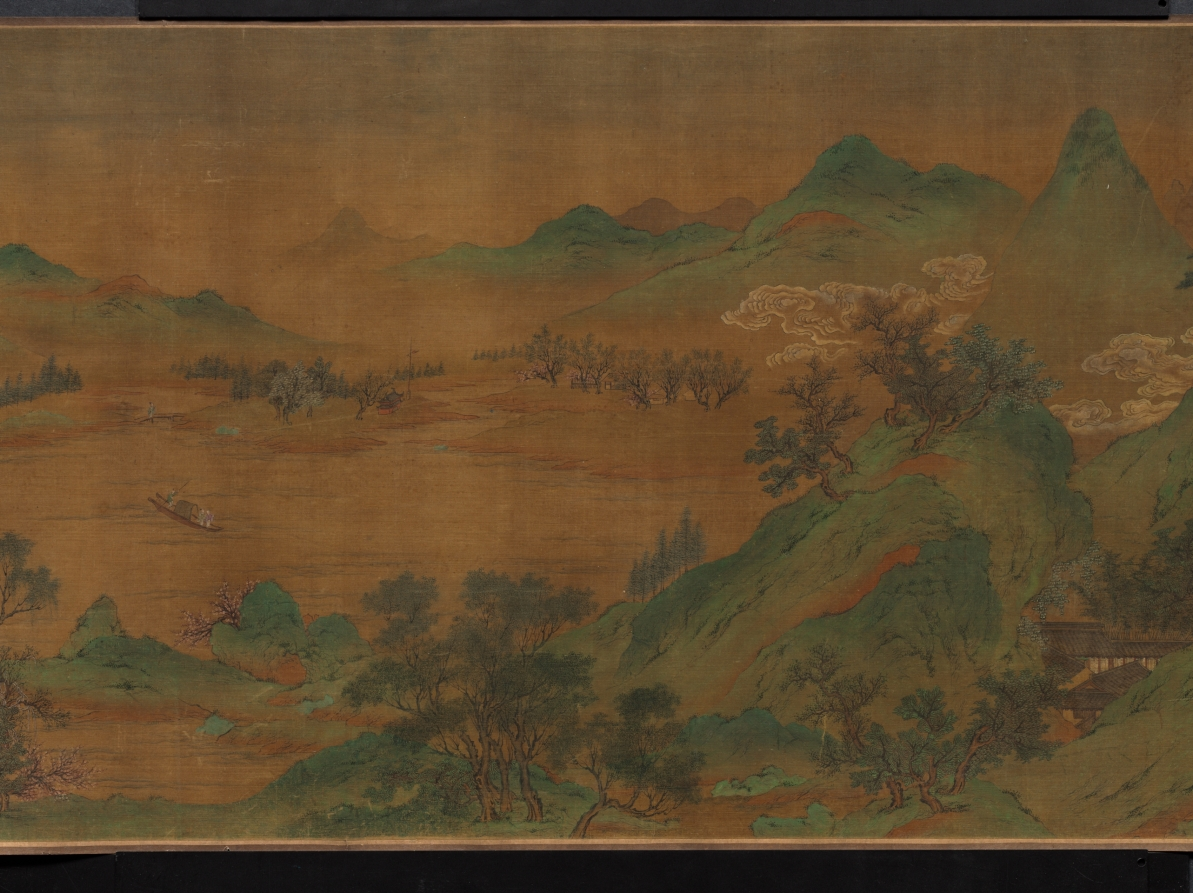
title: Landscape, The Palace of the Clouds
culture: China, Qing dynasty (1644-1911)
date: 1644–1911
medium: handscroll, ink on silk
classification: Painting